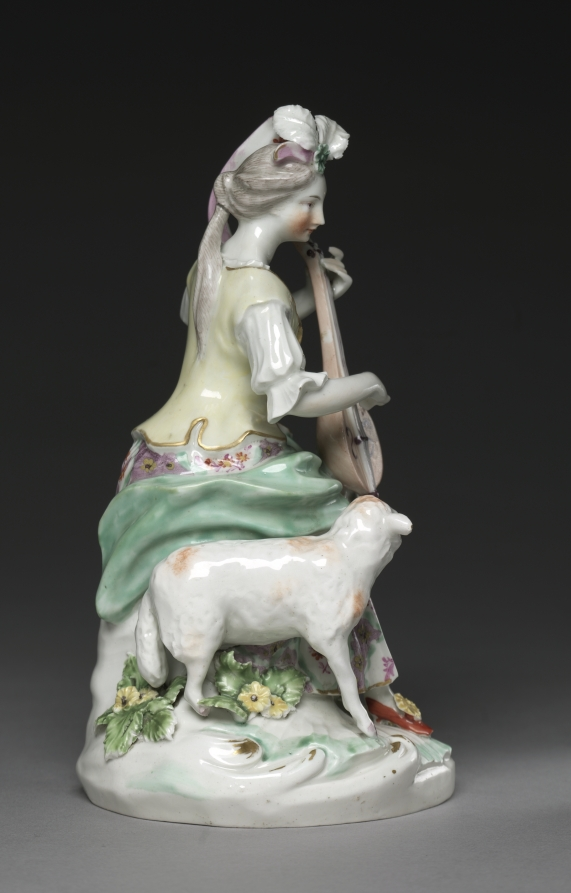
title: Seated Musician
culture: England, Derby, 18th century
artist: Derby Porcelain Factory (British)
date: c. 1765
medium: soft-paste porcelain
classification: Ceramic